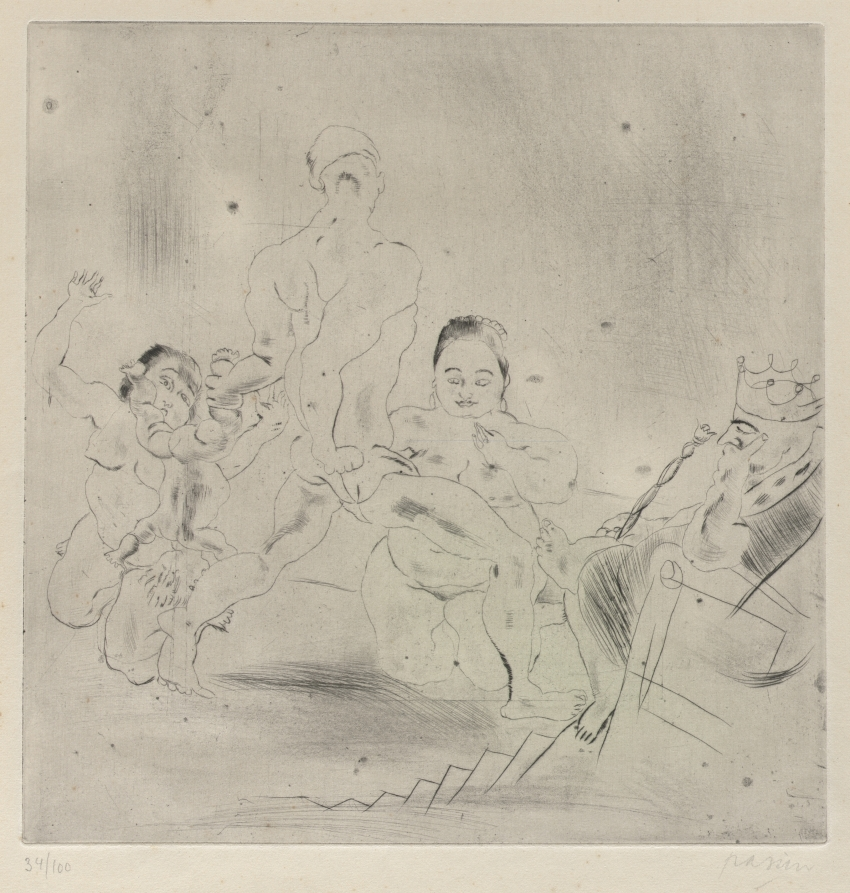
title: The Judgment of Solomon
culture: France, 20th century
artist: Jules Pascin (French, 1885–1930)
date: 1915–30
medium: drypoint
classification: Print